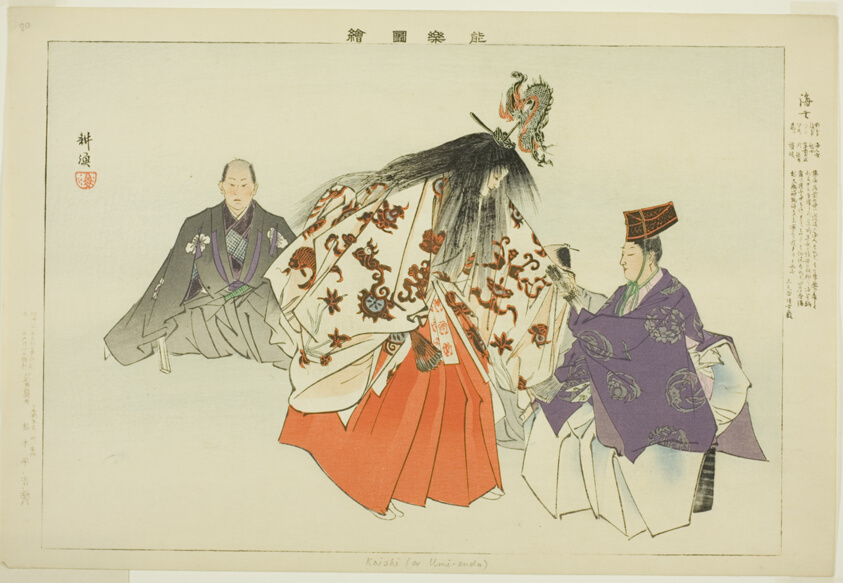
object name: Print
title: Ama, from the series "Pictures of No Performances (Nogaku Zue)"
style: Japanese (culture or style)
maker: Tsukioka Kogyo; Japanese, 1869-1927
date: 1898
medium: Color woodblock print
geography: Japan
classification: woodblock print; print; asian art